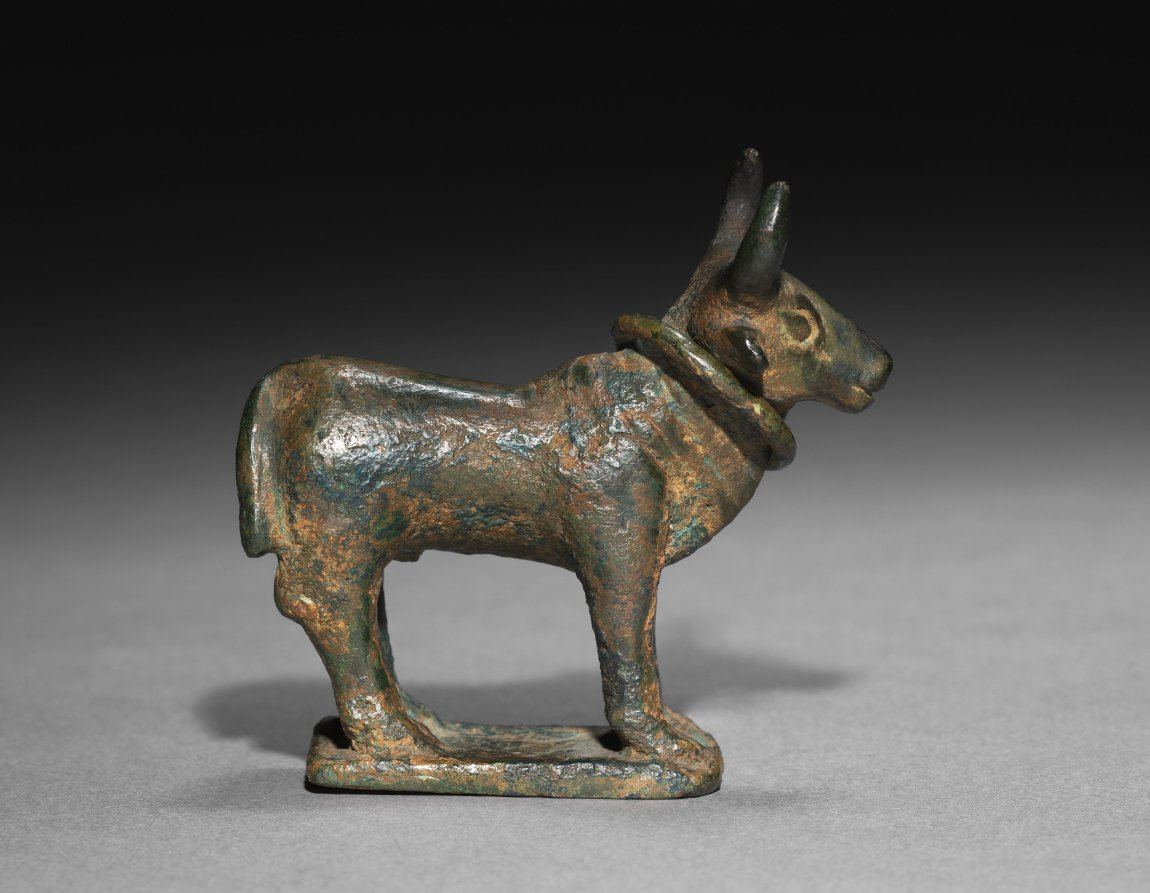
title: Statuette of a Bull with Curved Horns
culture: Egypt(?)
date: late 2000s BCE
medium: bronze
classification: Sculpture